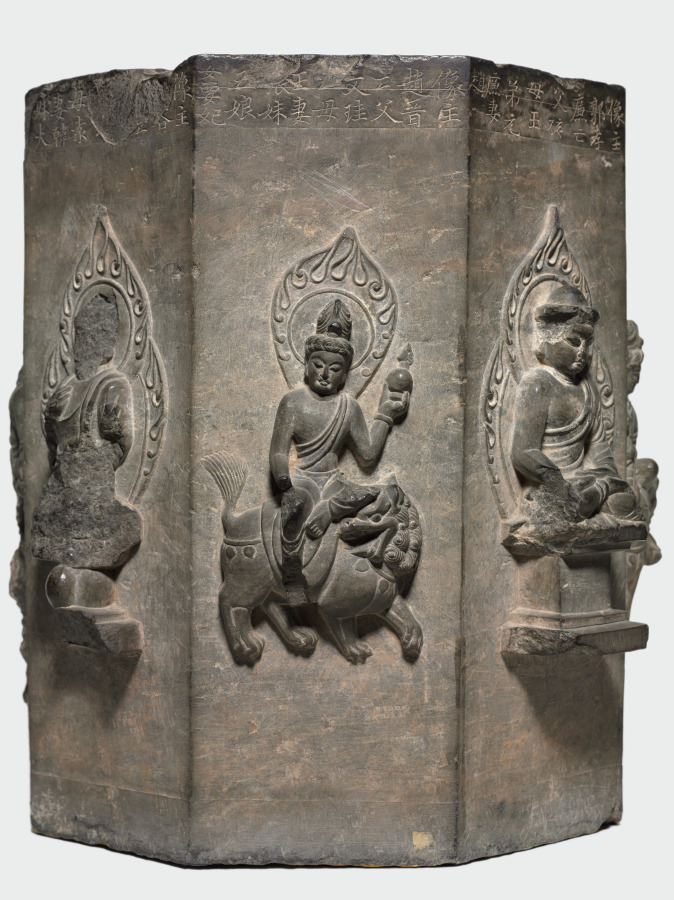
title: Section of a Dharani Pillar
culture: China, Tang dynasty (618-907)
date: 618–907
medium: limestone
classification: Sculpture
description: This octagonal stone pillar, with Buddhist figures carved on its eight sides, is part of a dharani pillar commissioned by Buddhist believers to pay tribute to the dead. The eight inscriptions seen here are eulogies dedicated by eight families to their deceased family members. Dharanis were a form of spell in Esoteric Buddhism said to possess supernatural power when being recited or carried and were incorporated into sutras, such as the Buddha Usnisa Vijaya Dharani Sutra. Dharani pillars, also called sutra pillars, became the dominant bearers of Usnisa Vijaya Dharani which supposedly helped sentient beings prolong life and destroy hardships of the eternal cycle of life and the realms of hell.